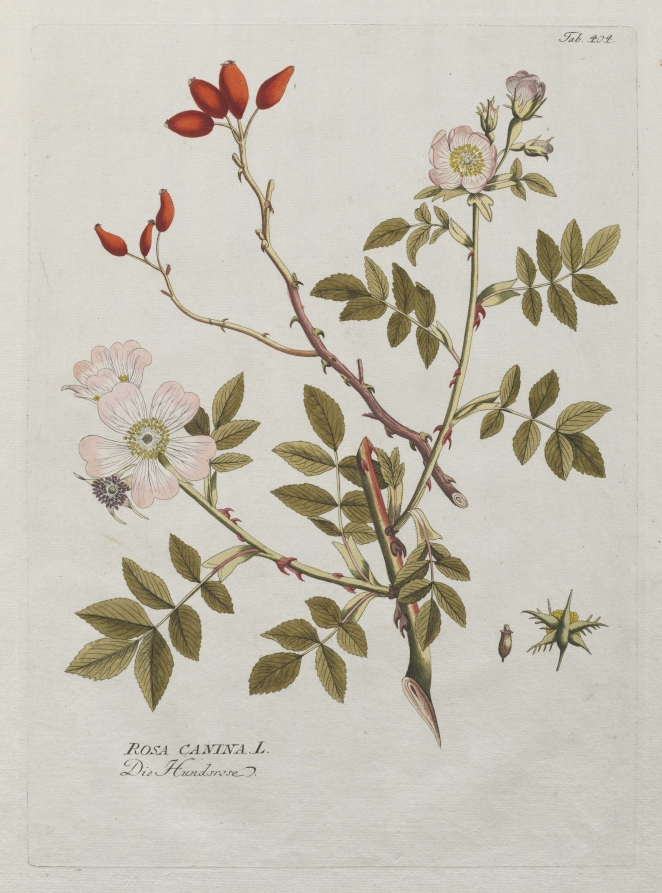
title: Icones Plantarum Medicinalium: Dog Rose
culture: Germany, late 18th-early 19th Century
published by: Joseph Jacob Plenck (German)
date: 1788–1812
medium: engraving, hand-colored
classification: Print